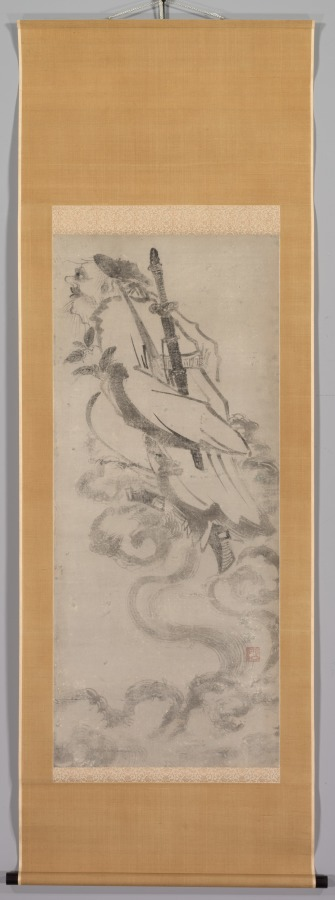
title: The Ascending Daoist Immortal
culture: Japan, Edo period (1615–1868)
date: 1700s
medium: hanging scroll; ink on paper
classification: Painting